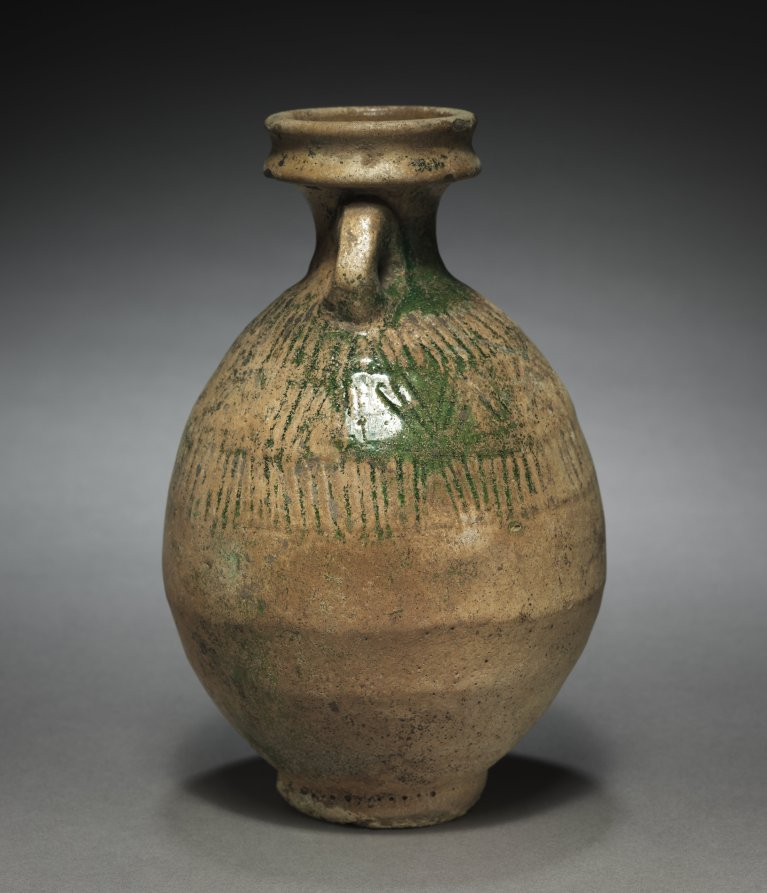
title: Ovoid Vase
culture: Parthian Empire (247 BCE–224 CE)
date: 1–200 CE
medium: terracotta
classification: Ceramic